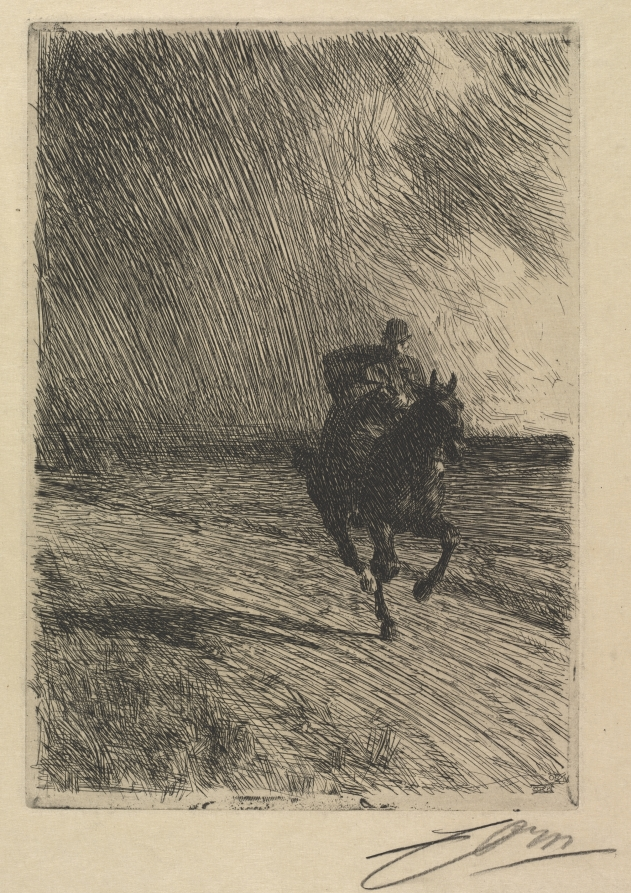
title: Storm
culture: Sweden, late 19th Century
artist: Anders Zorn (Swedish, 1860–1920)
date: 1891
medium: etching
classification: Print